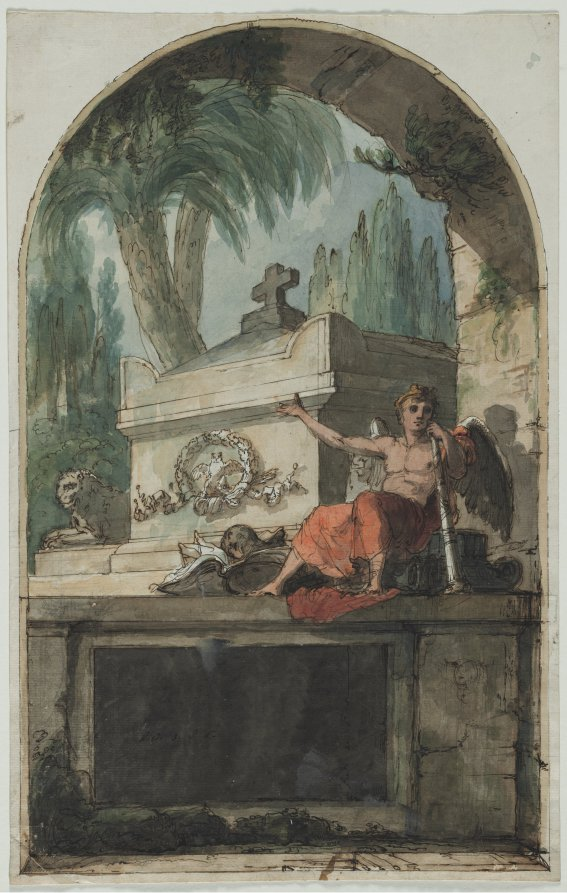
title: Design for a Fresco of the Tomb of Vincenzo Martinelli (1737-1807) in the Certosa of Bologna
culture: Italy, 19th century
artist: Pietro Fancelli (Italian, 1764–1850)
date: c. 1810–1820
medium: pen and brown ink and watercolor with graphite underdrawing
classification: Drawing